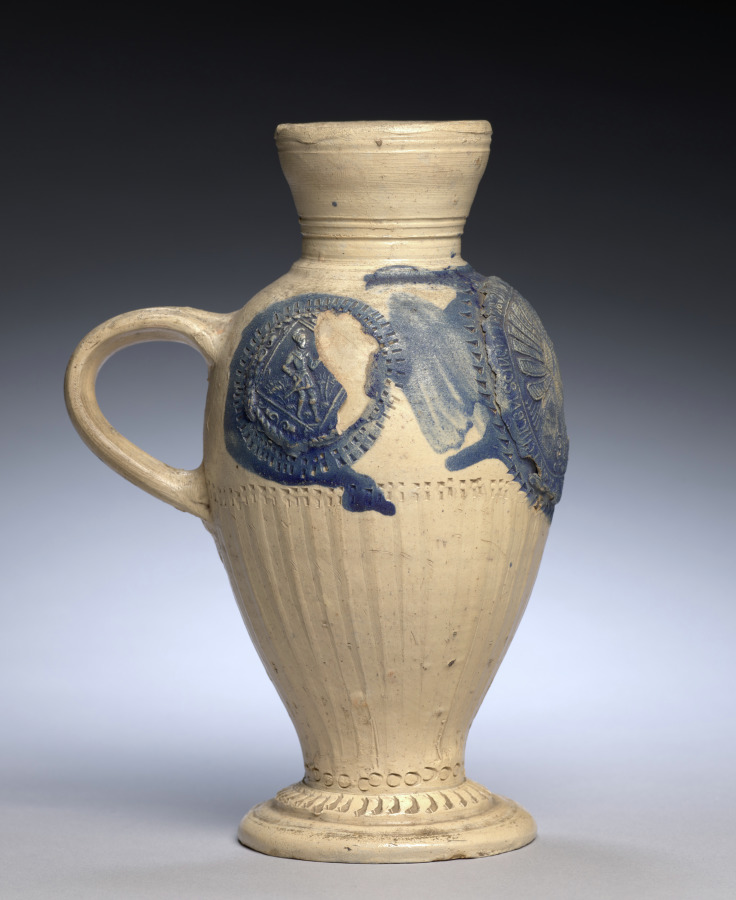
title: Light Tan Pitcher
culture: Germany, Rhenish, probably Sieberg, 19th century (?)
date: 1800s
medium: stoneware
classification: Ceramic